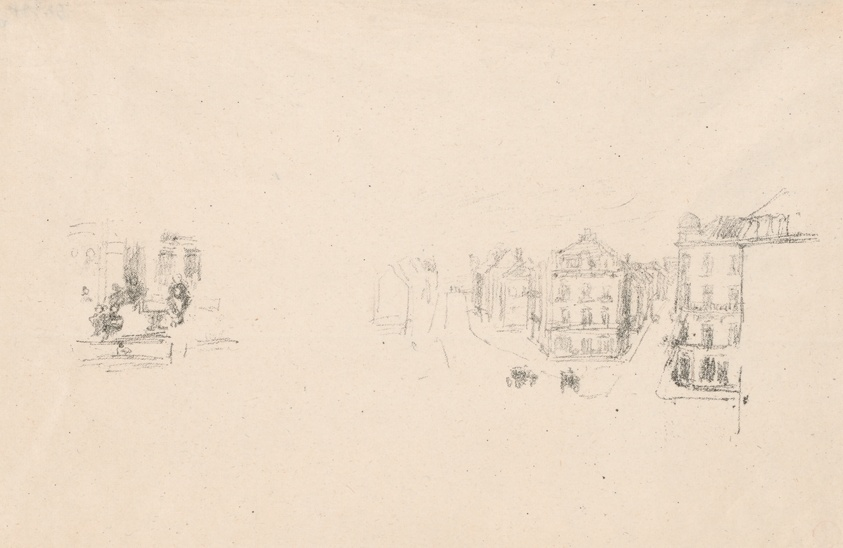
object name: Print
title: Two Trial Sketches: A. Grand Rue, Dieppe; B. An Interior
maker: James McNeill Whistler (American, 1834-1903)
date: c. 1891, printed 1904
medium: Transfer lithograph in black on ivory wove paper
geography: United States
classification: transfer lithograph; lithograph; print; prints and drawing; paper